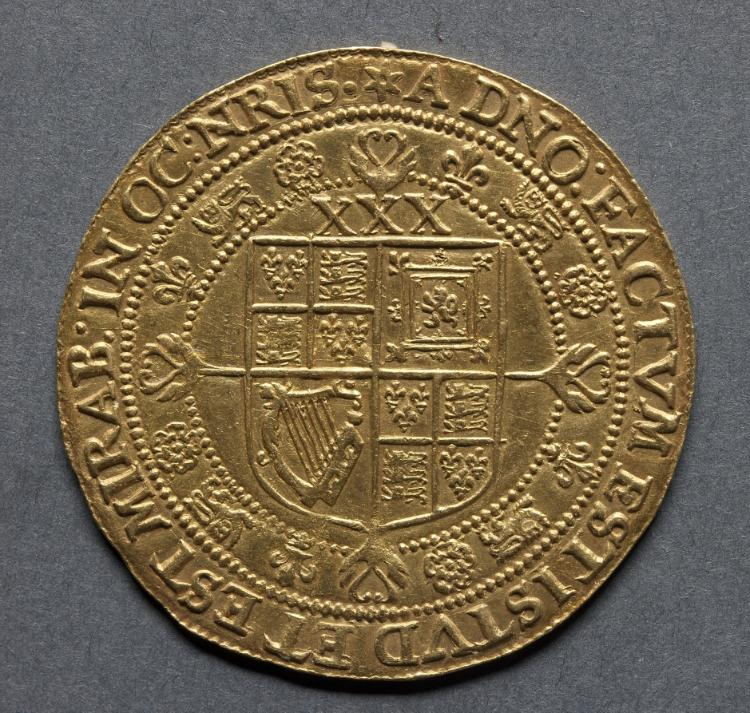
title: Rose Ryal: Shield of Arms (reverse)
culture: England, James I, 1603-1625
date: 1619–1620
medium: gold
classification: Coins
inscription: A. DNO FACTUM EST ISTUD ET EST MIRAB IN OCULIS NRIS, XXX